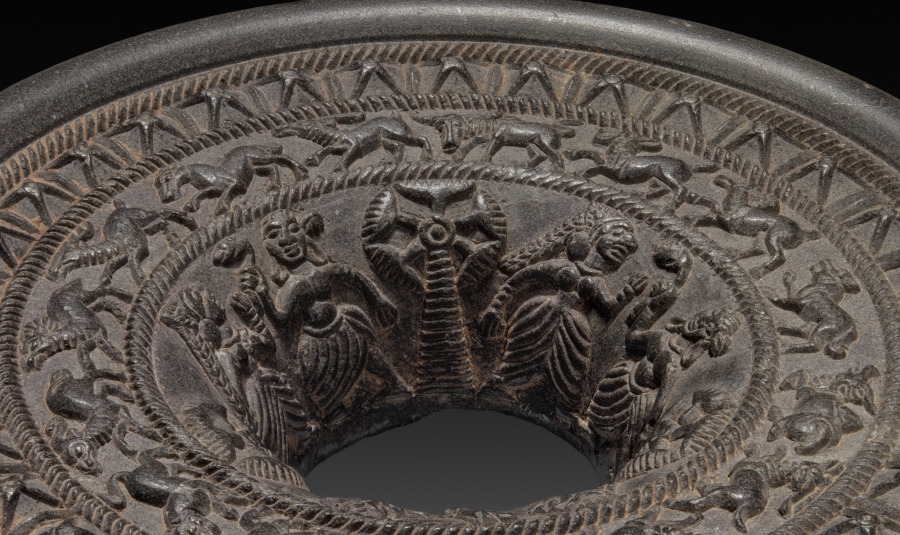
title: Ringstone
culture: India, Maurya period (322–185 BCE)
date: 200s BCE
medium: steatite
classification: Sculpture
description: Ringstones are among the earliest works of art to be created in stone during India's historical period. This example is finely carved with detailed images of affectionate couples and palm trees, running animals, and geometric motifs in concentric circles. The function of ringstones remains uncertain, since none of the surviving examples is inscribed or explained in a text.